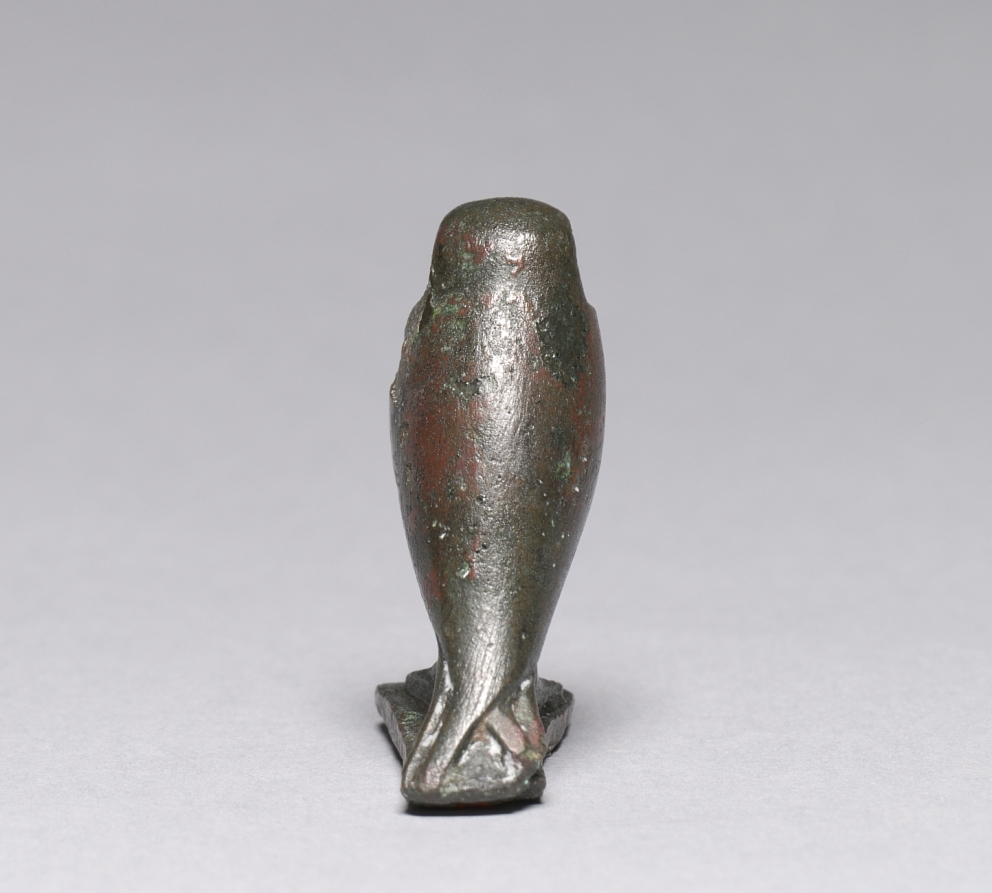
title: Horus Falcon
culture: Egypt, Late period (715–332 BCE), Dynasty 26 or later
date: 664–30 BCE OR 664–330 BCE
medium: bronze, solid cast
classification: Sculpture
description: The falcon stands in hieroglyphic form—body erect, feet together—on a thin, oblong base with a tang beneath. The eye and beak are the only areas with incised details. Numerous such images of this important bird, an age-old symbol of Egyptian kingship, survive.